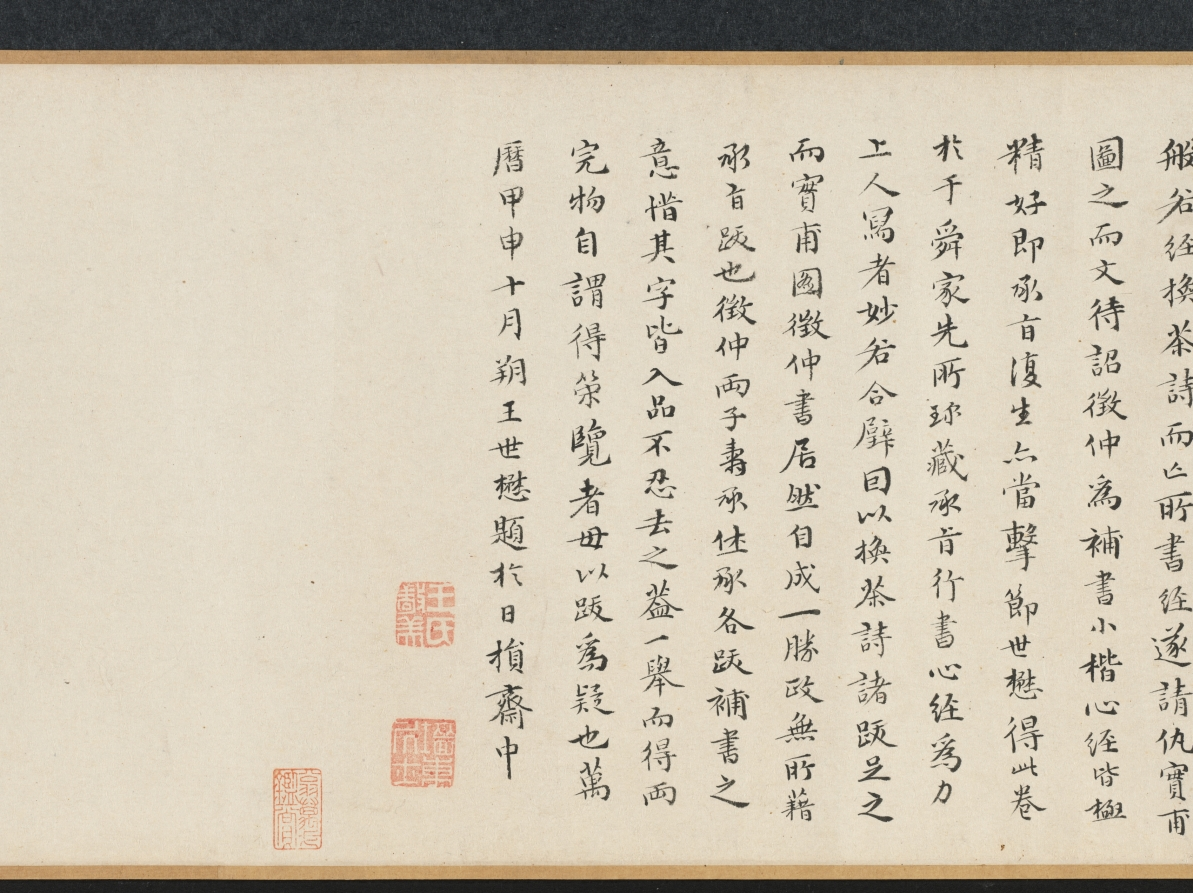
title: Zhao Mengfu Writing the Heart (Hridaya) Sutra in Exchange for Tea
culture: China, Ming dynasty (1368–1644)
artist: Qiu Ying (Chinese, 1494–1552)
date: 1542–43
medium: handscroll, ink and light color on paper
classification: Painting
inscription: Inscription accompanying text of "Heart" sutra, by Wen Zhengming 文徵明 (1470-1559): Zhengming 徵明, written in a boat at Kunshan 崑山, on the twenty-first day of the ninth month, in the renyin 壬寅 year, the twenty-first year of the Jiajing era [1542].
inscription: Colophon by Wang Shih-mou: Chou Yü-shün [Feng-lai] of K'un-shan was a scholarly, refined connoisseur of antiquities. He had acquired the poem written by Chao Ch'eng-chih [Chao Meng-fu] about the exchage of tea for Chao's calligraphy of the Prajna sutra. But the sutra itself, also written by Chao Meng-fu, is lost. He therefore asked Ch'iu Shih-fu [Ch'iu Ying] to do a painting and had Wen Cheng-ming, the artist-in-attendance, write the Hridaya Sutra in the "small, regular" style for replacement. Both works are so excellent that even Chao Meng-fu himself would certainly applaud if he should be reborn to see them. I, Shih-mou, had gotten possession of this scroll from the family of Chou Yü-shün, and since it was so wonderfully matched with one of the treasures in my collection. the Hridaya Sutra written by Chao Meng-fu for Priest Li in "running script," like the reuniting of two halves of a jade pi, I completed the scroll with the several colophons written for the "tea-exchange" poem. I did this because the painting of Ch'iu Ying and the calligraphy of Wen Cheng-ming are definitely masterpieces by themselves with absolutely no need to depend on any of the colophons written for the Chao Meng-fu poem. Furthermore, the two sons of Wen Cheng-ming, Shou-ch'eng [Wen P'eng] and Hsiu-ch'eng [Wen Chia]. have each written a colophon explaining the reason for replacing the calligraphy. As their writings are both acceptable for high standard, I didn't want to throw them away. [So by separating these into two scrolls] I was able to get two complete works of art in one clever stroke. I was quite pleased with myself, and hope that those who see this scroll shall not get suspicious because of the missing colophons. Wang Shih-mou wrote in his Jih-sun-chai study, on the first day of the tenth month, in the chia-shen year of the Wan-li era [1584].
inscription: Colophon by Wen P'eng: I-shao [Wang Hsi-chi] wrote in exchange for a flock of geese. Su Tung-po wrote in exchange for meat. Both episodes have become legends of a thousand years. Sung-hsüeh [Chao Meng-fu] "teased" Priest Kung for tea, and the story was immediately immortalized in the poems by all the famous scholars of the times. Indeed, how could one say his humor and elegance are not equal to the ancient worthies? Unfortunately, the poetry has survived but the writing of the sutra is lost. Yü-shün [Chou Feng-lai] therefore asked my father to make up the writing and so here is the complete work of art. Respectfully inscribed by Wen P'eng in the mid-summer of 1543.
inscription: Colophon by Wen Chia: Sung-hsüeh [Chao Meng-fu], in exchanging tea leaves for his writing of the Prajna, had put himself in the company of Yu-chün [Wang Hsi-chih] who exchanged geese for his writing of the Huang-t'ing sutra [the Yellow Chamber, or the Wai-ching ching, a Taoist text attributed to the Yellow Emperor]. However, was this romantic and cultivated gesture really intended for such small things? Actually, he was only proud that the excellence of his calligraphy had made him worthy to be the successor of the Ch'in Dynasty master. Since, very unfortunately, Chao Meng-fu's writing [of the Prajna] was already lost, my father therefore agreed to replace it, and did the calligraphy in the style of the Yellow Chamber. In addition, Yu-shün [Chou Feng-lai] had asked Mr. Ch'iu Shih-fu [Ch'iu Ying] to do a painting of the sutra writing story in the style of Li Lung-mien at the head of the scroll. Now it would seem the entire episode should go down in history for immortality. Respectfully recorded by Wen Chia, on the eighth day of the eighth month, in the year of k'uei-mao [1543]. trans. WKH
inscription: 4 colophons and 23 seals: 1 colophon, dated 1543, and 2 seals of Wen Peng (1498-1573); 1 colophon, dated 1543, and 2 seals of Wen Chia (1501-1583); 1 colophon, dated 1584, and 3 seals of Wang Shih-mou (1536-1588); 2 seals of Chou Feng-lai (16th c.); 3 seals of Sung Lo (1634-1713); 5 seals of the Ch'ien-lung emperor (r. 1736-95); 1 colophon, dated 1902, and 1 seal of Fei Nien-tz'u (1885-1905); 4 seals of Wan-go H. C. Weng (b. 1918); 1 seal unidentified.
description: The Yuan dynasty calligrapher Zhao Mengfu (1254–1322) is said to have transcribed the Heart Sutra for a certain priest named Li in exchange for tea. Later, during the Ming dynasty, the professional painter Qiu Ying from Suzhou painted this scene for his patron. Here, Zhao Mengfu holds a brush and has a piece of paper laid out before him. On the table is an ink stone, an ink stick, and a small water dropper. Drops of water would dissolve the ink stick into liquid ink when it was ground on the flat square stone.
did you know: Qiu Ying was born to a peasant family, but his natural talent led him to a successful career as a professional painter with wealthy patrons.